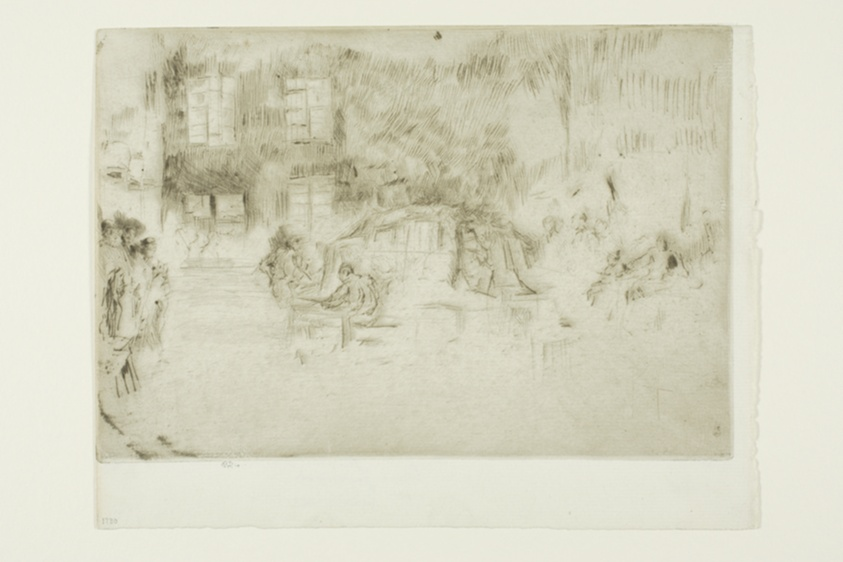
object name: Print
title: Murano - Glass Furnace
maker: James McNeill Whistler (American, 1834-1903)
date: 1879/80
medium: Drypoint in black ink on off-white laid paper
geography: United States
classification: drypoint; print; prints and drawing; paper